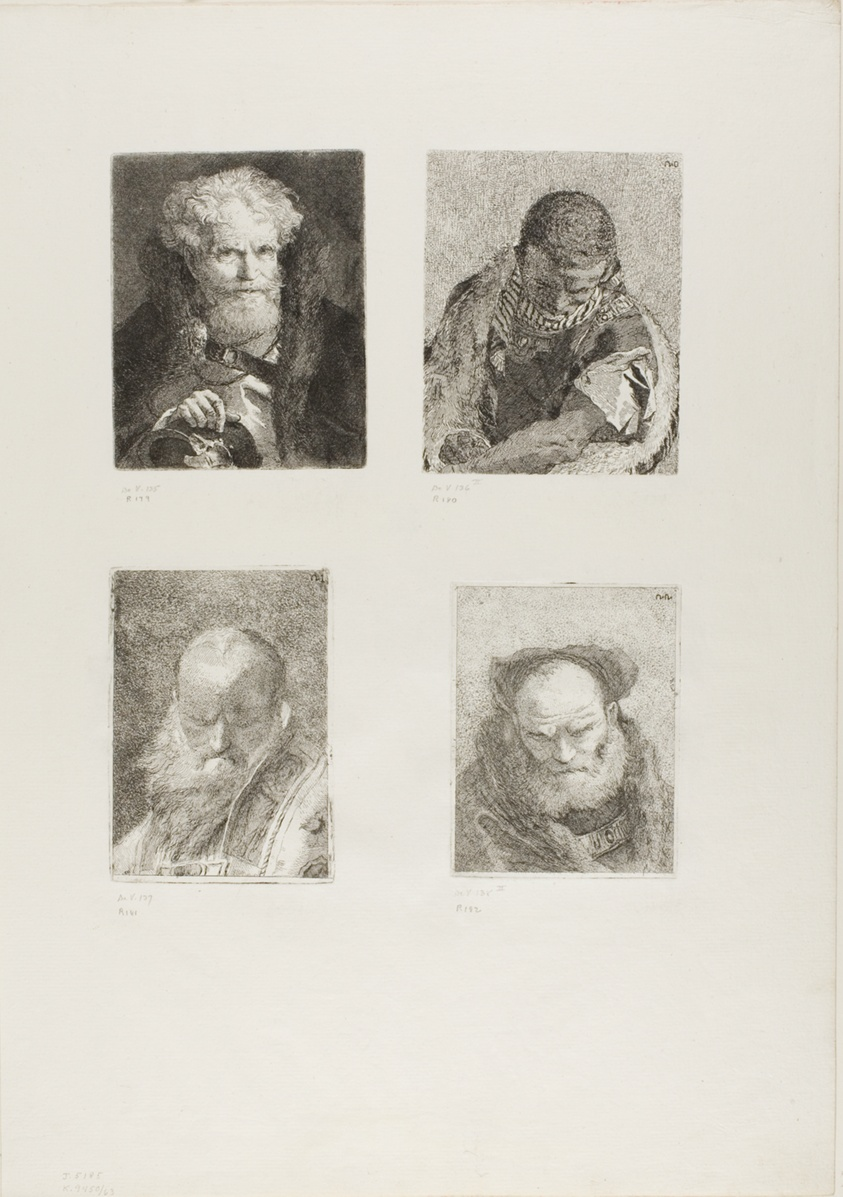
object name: Print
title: Old Man with a Helmet, Young Moor, Old Man with a Bare Head, Old Man with a Beard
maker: Giovanni Domenico Tiepolo (Italian, 1727-1804)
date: 1775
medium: Four etchings on ivory laid paper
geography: Italy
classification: etching; print; prints and drawing